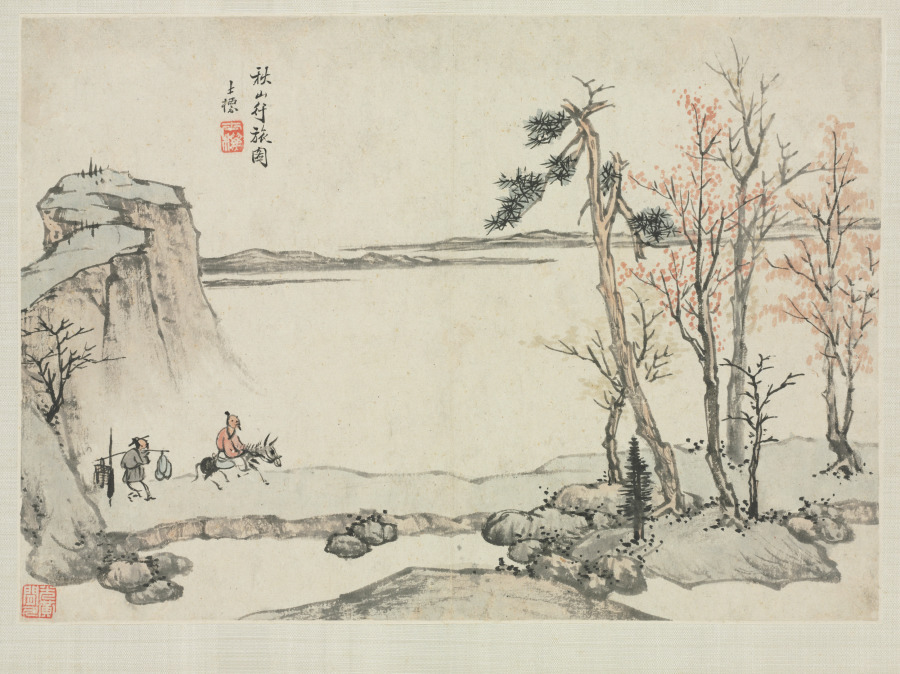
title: Landscape Album in Various Styles: Traveling in Autumn Mountains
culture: China, Qing dynasty (1644-1911)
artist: Zha Shibiao (Chinese, 1615–1698)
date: 1684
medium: album leaf, ink and light color on paper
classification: Painting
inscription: Artist's inscription, signature, and seal: A picture of traveling in autumn mountains. Shibiao [seal] Shibiao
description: Zha Shibiao, a native of Anhui province, moved to Yangzhou later in his career, like so many of his fellow countrymen. At age 68, he painted this album with seasonal landscapes in various styles. Painted in fresh colors and wet strokes, all depict typical scenes of Jiangnan, the Yangzi delta: a herdboy on a buffalo wading through water, boating on the stream to the Peach Blossom Spring at Wulin, a waterfront town shrouded in mist, a scholar on his donkey enjoying the red autumn leaves, and drinking tea on a boat while watching migrating birds.